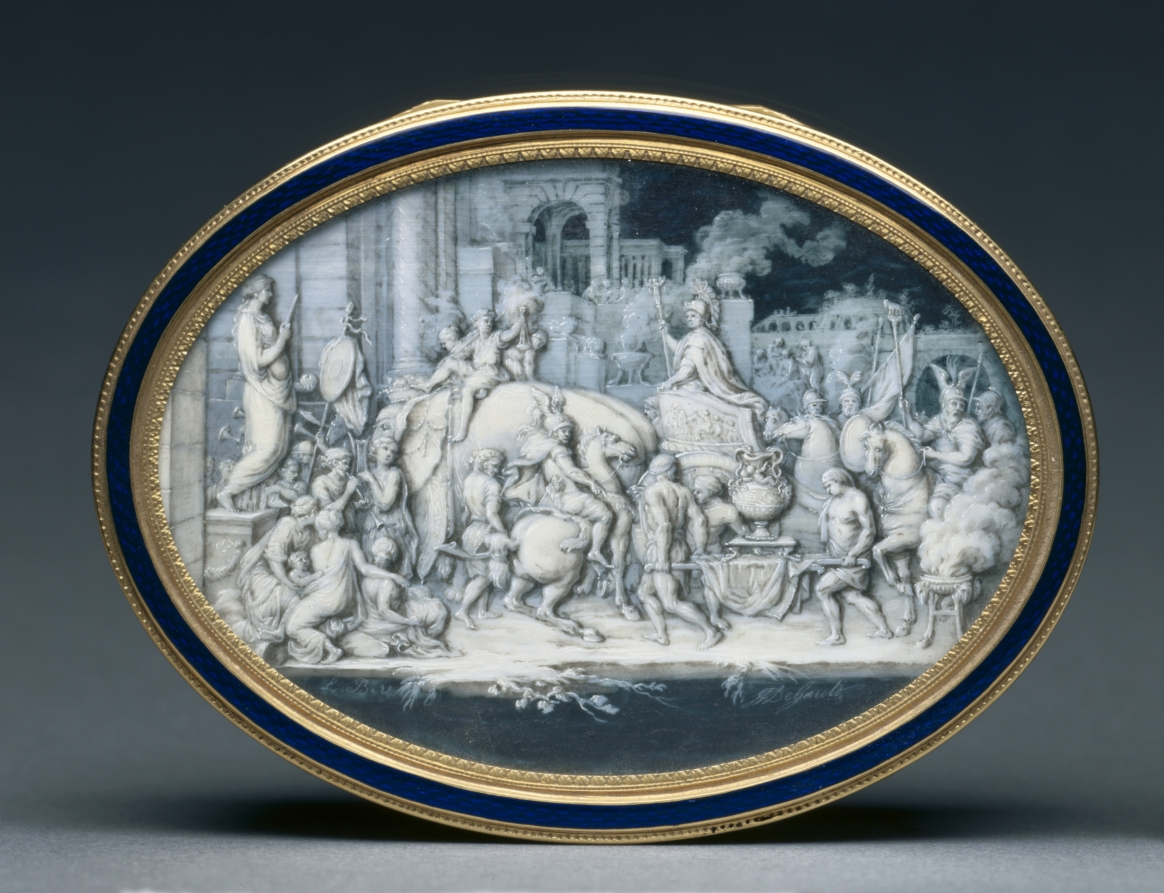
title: Snuff Box (Tabatière)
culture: France, 18th century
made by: Pierre Marie Gault De Saint-Germain (French, 1754–1842)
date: 1779–80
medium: gold and enamel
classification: Miscellaneous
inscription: [Warden's mark for Paris, 1779-1780, inside bottom; inside cover]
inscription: [Illegible maker's mark, inside bottom; inside cover]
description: Decorated with images derived from ancient Greek and Roman history in the style of cameos, intricately carved gemstones, this box evokes the rising neoclassical imagery in France. The scenes on the box recount several key events in the life of Alexander the Great. The enameled works were inspired by a series of prints by Sébastien Leclerc which drew from a series of paintings by Charles Le Brun.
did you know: The original series painted by Charles Le Brun, The Battles of Alexander (Les Batailles d’Alexandre) (1600s), was commissioned by King Louis XIV of France.